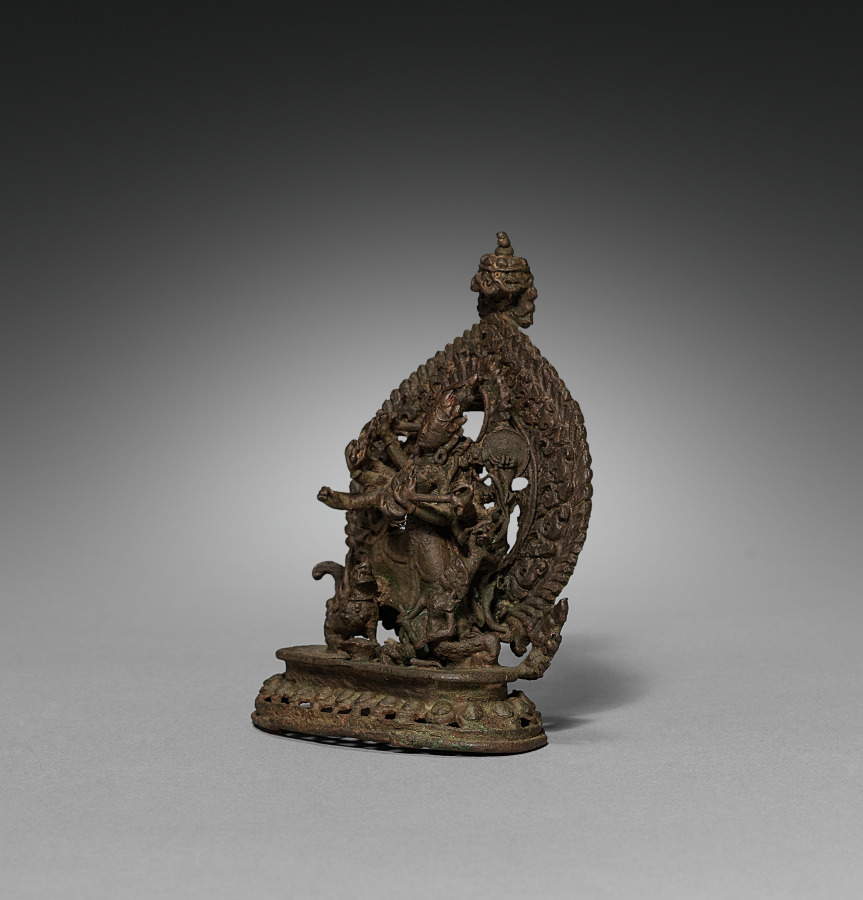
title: Durga Slaying the Demon Buffalo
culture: Nepal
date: 1500s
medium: bronze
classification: Sculpture